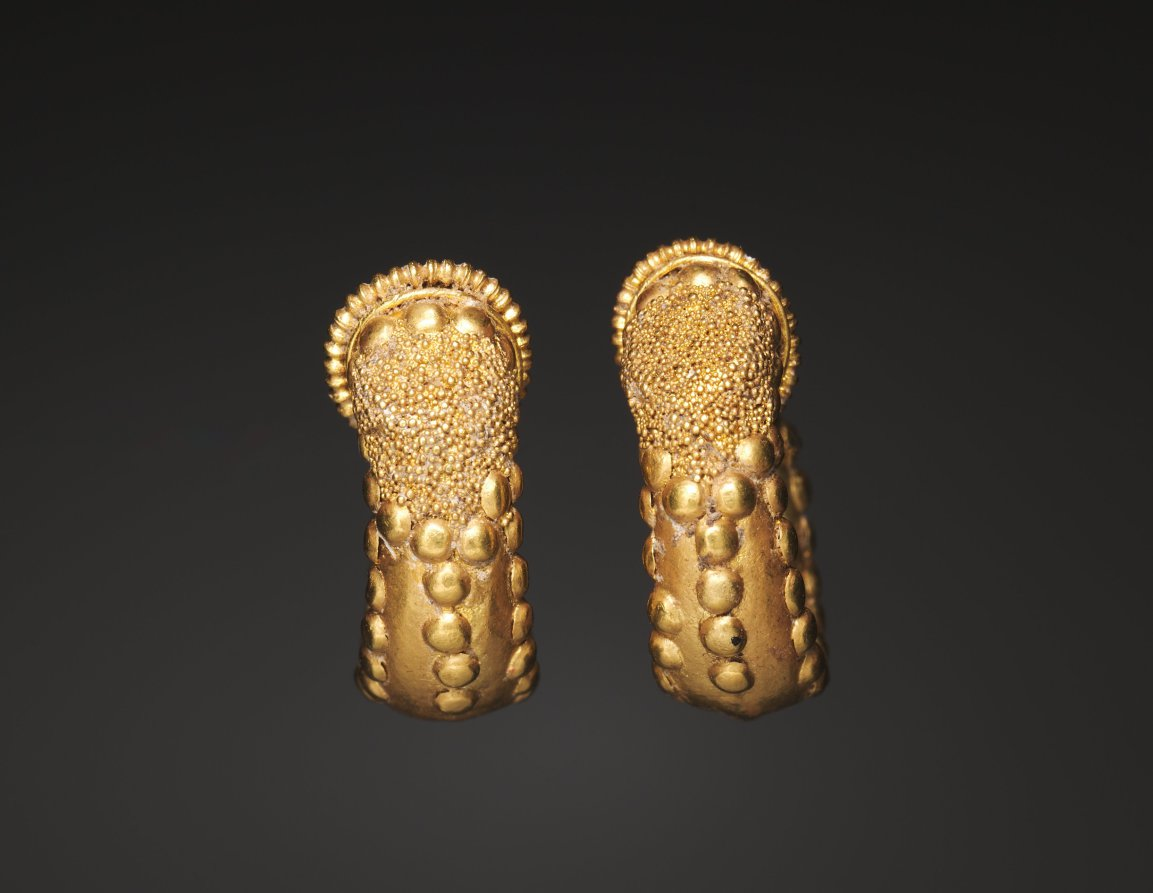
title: Pair of Earrings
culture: Etruscan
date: 300s BCE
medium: gold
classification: Jewelry